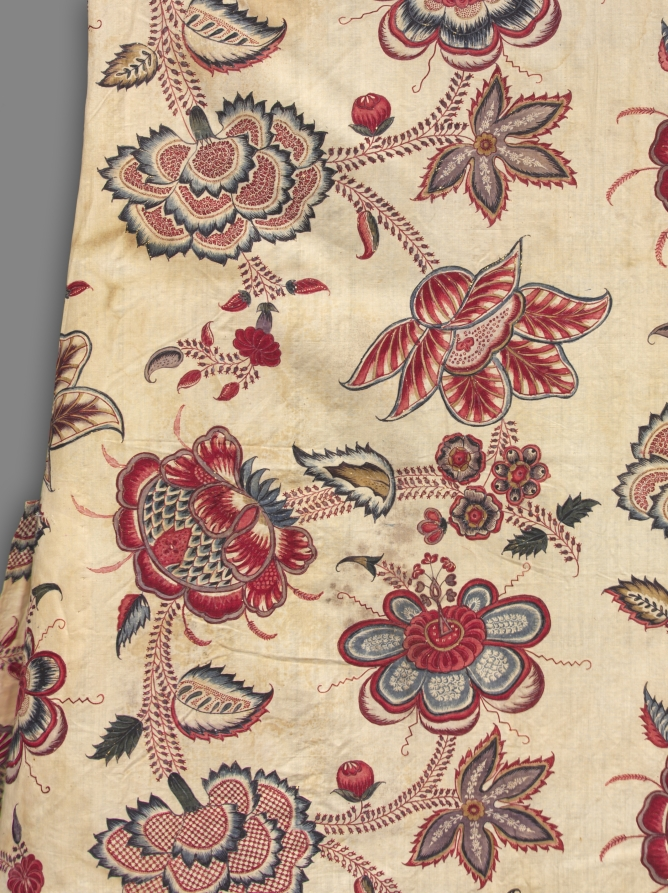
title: Man's Morning Coat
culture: India, Mughal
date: 1700–1750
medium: cotton: tabby weave, resist-dyed (mordant resist and batik); applied gold leaf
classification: Garment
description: Much of the Mughals’ wealth derived from the international export of textiles, which became increasingly fashionable throughout Europe and America during the 18th century. This garment was made in India for the aristocratic French market. The floral designs inspired by the southern Indian dyed fabrics known as palampore have been enlivened by labor-intensive gilding and burnishing.